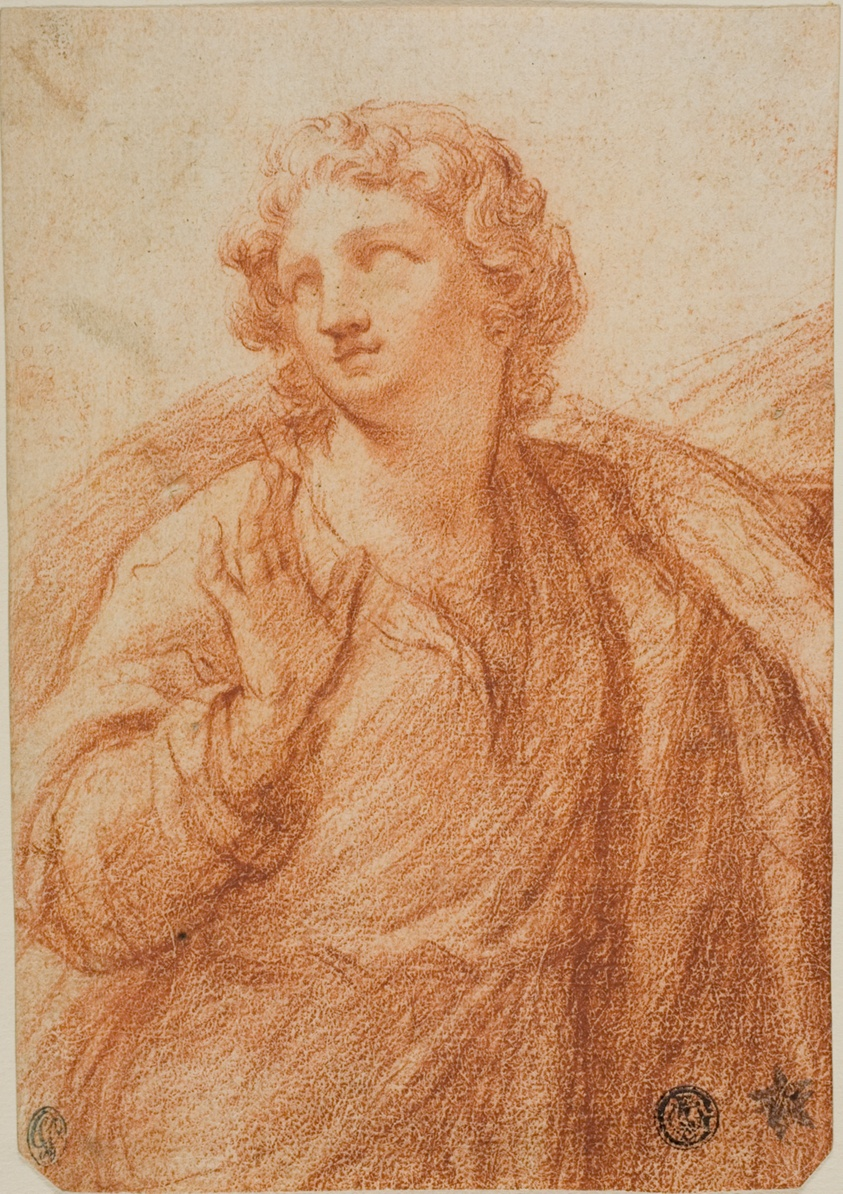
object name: Drawing and Watercolor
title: Half-length Draped Figure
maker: Guido Reni (Italian, 1575-1642)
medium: Red chalk on ivory laid paper, tipped onto cream wove paper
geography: Italy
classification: chalk; drawings (visual works); prints and drawing